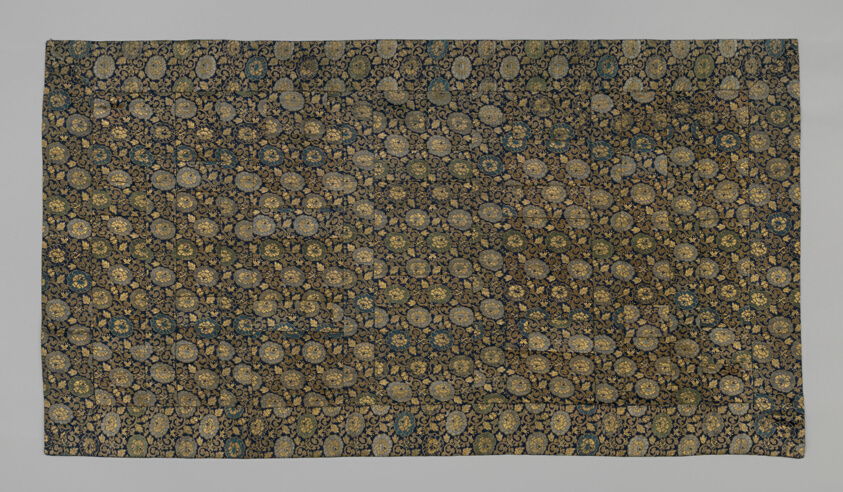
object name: Religious/Ritual Object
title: Kesa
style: edo (japanese period)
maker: Japan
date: late Edo period (1789–1868), late 18th/early 19th century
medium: silk and gilt-paper; compound satin weave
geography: Japan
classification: textile; weaving; liturgical - buddhist; costume; ritual objects